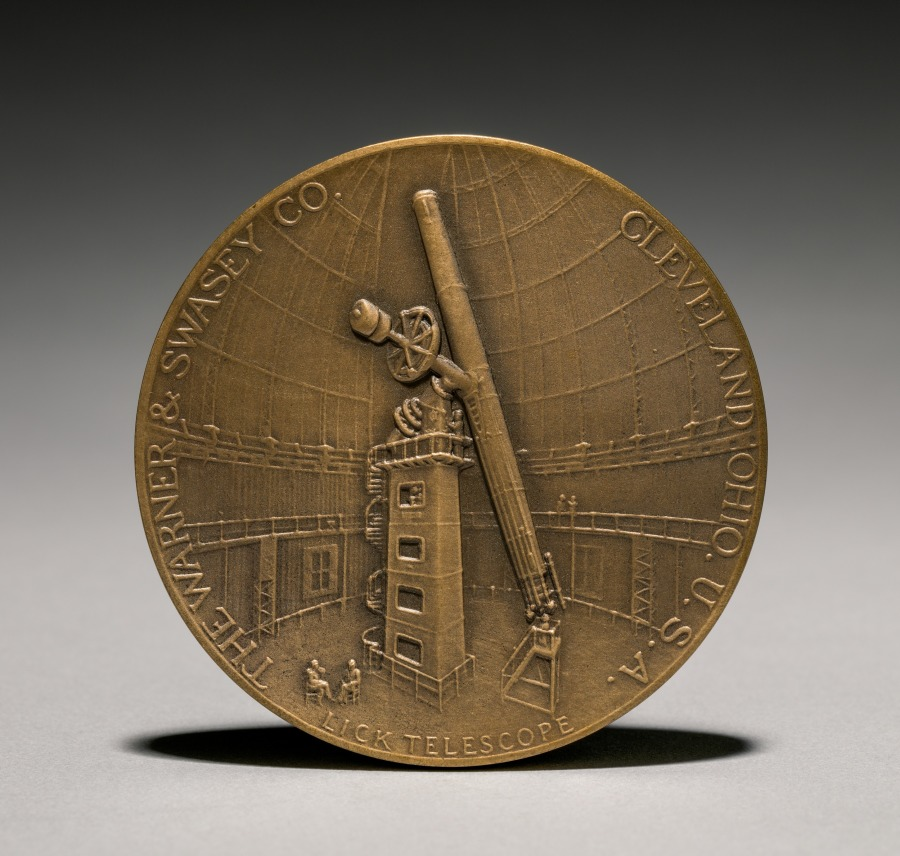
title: Medal: In Commemoration of the Fiftieth Anniversary - The Warner and Swasey Company (reverse)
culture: America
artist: Victor D. Brenner (American, 1871–1924)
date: 1930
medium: bronze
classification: Metalwork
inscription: center bottom: "LICK TELESCOPE"; left: "THE WARNER & SWASEY CO."; right: "CLEVELAND, OHIO, U. S. A.